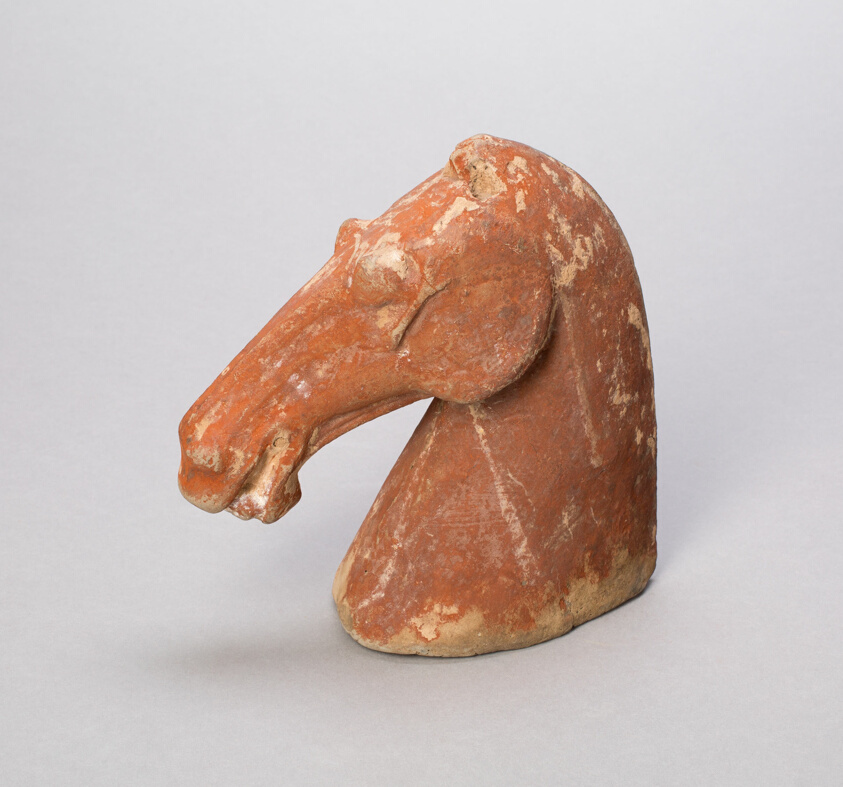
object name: Sculpture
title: Head of a Horse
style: Chinese (culture or style)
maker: China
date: Han dynasty (206 B.C.–A.D. 221)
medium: Earthenware with polychrome pigments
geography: China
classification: ceramics; asian art; sculpture